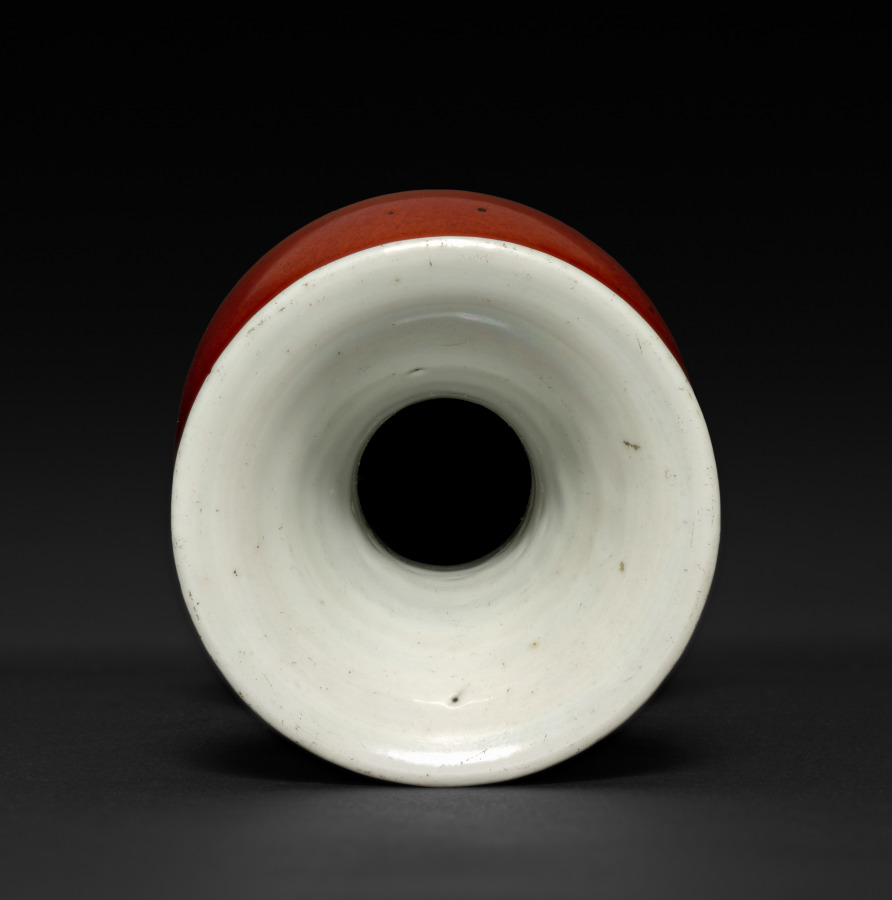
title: Vase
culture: China, Jiangxi Province, Jingdezhen kilns, Qing dynasty (1644–1911), Yongzheng reign (1722–35)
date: 1723–35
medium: porcelain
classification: Ceramic